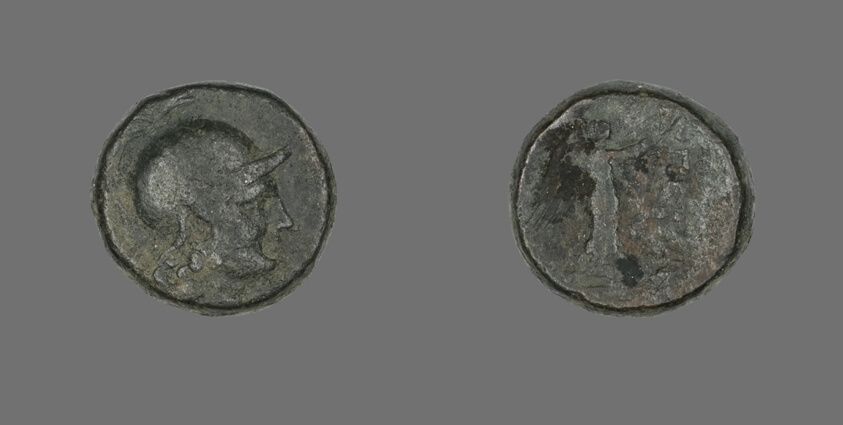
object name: Coin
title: Coin Depicting the Goddess Athena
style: greek, ancient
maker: Greek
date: after 133 BCE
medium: Bronze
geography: Ancient Greece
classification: coin; ancient art